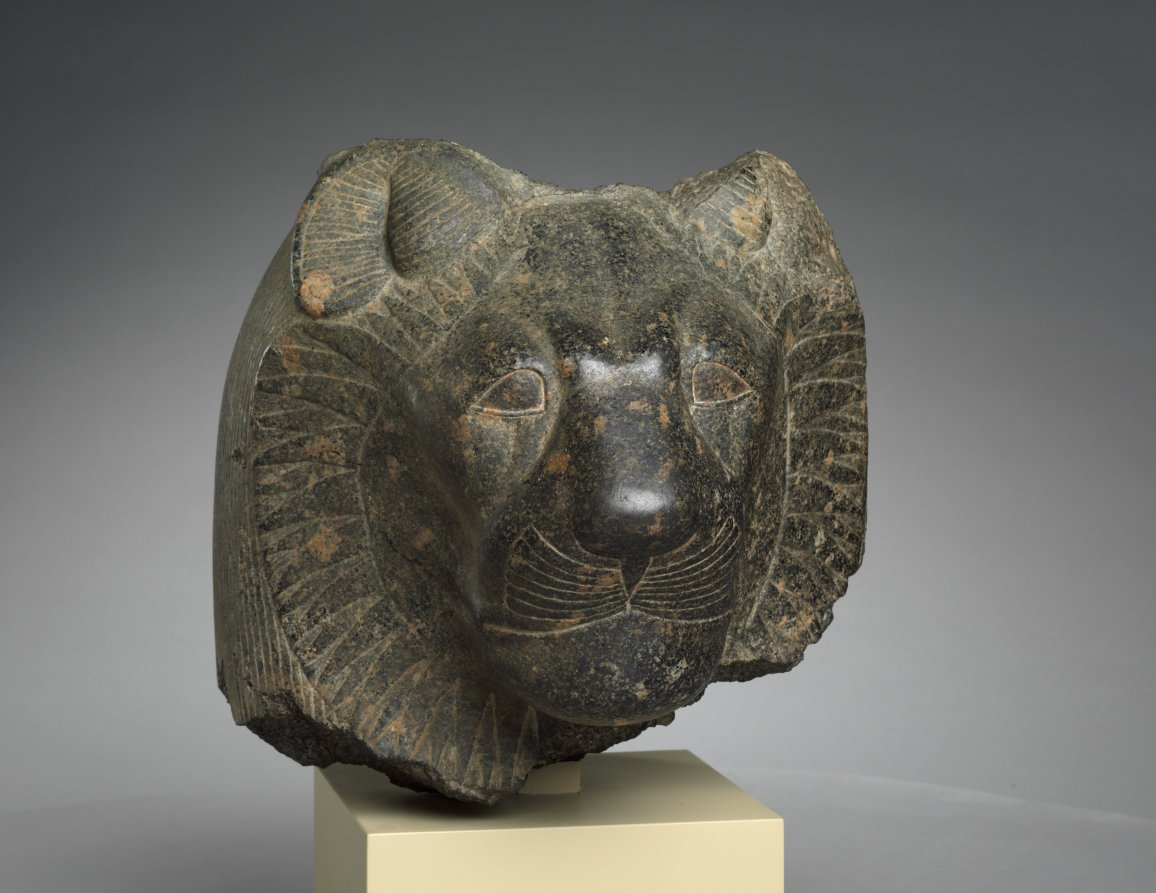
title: Head of Sekhmet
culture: Egypt, Thebes(?), New Kingdom (1540–1069 BCE), Dynasty 18, reign of Amenhotep III (1390–1352 BCE)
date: c. 1391–1353 BCE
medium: granodiorite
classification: Sculpture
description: This lioness head once belonged to a grand statue of the goddess Sekhmet, "the powerful one," probably seated and wearing a tight dress. Possibly appealing to her healing aspect, Pharaoh Amenhotep III, often described as “beloved of Sekhmet,” commissioned and dedicated hundreds of large granodiorite Sekhmet sculptures in his Theban mortuary temple. Thus, this head likely comes from Thebes, perhaps later moved across the Nile—like many such sculptures—to the temple of Mut, a related deity, at Karnak. Behind her stylized ruff, Sekhmet wears a wig, once crowned with a sun disk and uraeus, the stylized cobra symbolizing royal or divine power.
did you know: Amenhotep III may have dedicated 730 statues of Sekhmet, two for each day of the year.